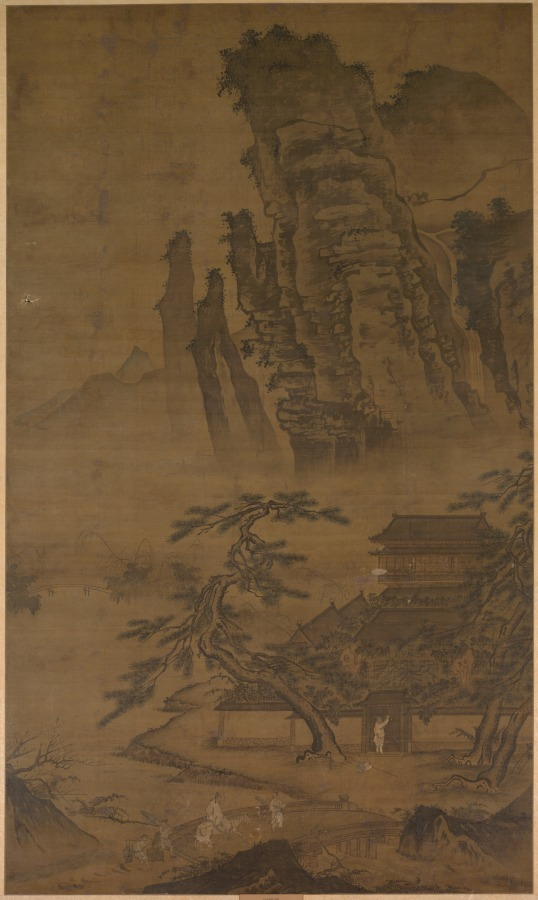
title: Landscape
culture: China, Qing dynasty (1644-1911)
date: 1644–1911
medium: Ink and color on silk panel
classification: Painting